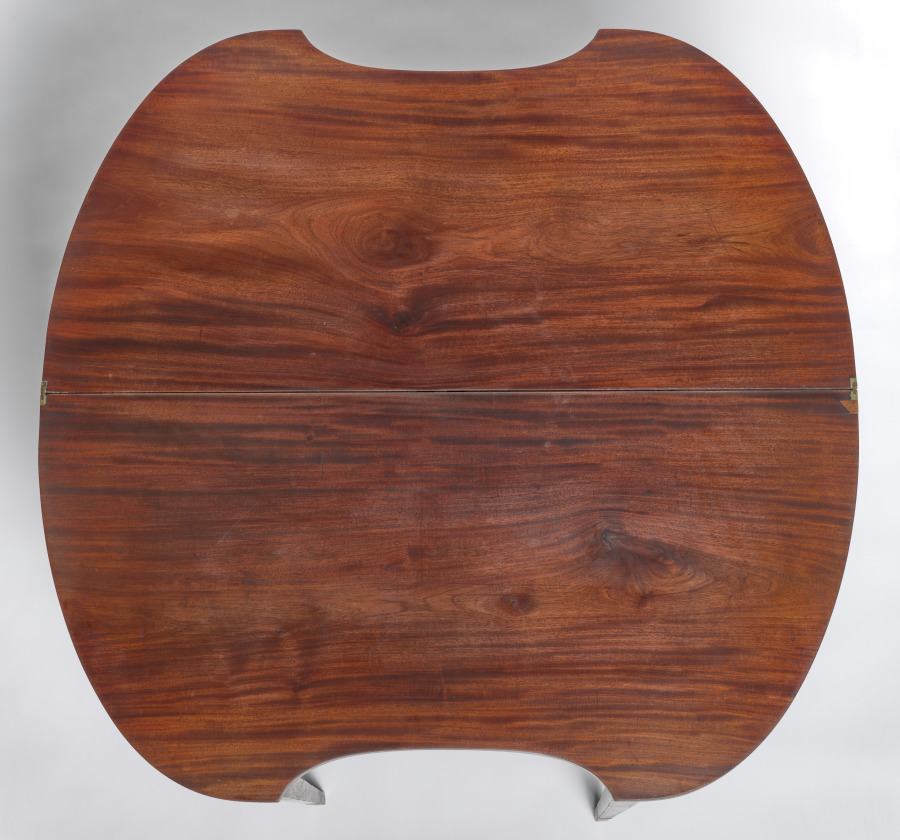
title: Game Table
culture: America, Maryland, Baltimore, early 19th Century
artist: style of George Hepplewhite (American, 1786)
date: c. 1800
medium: mahogany with inlays of various woods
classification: Furniture and woodwork